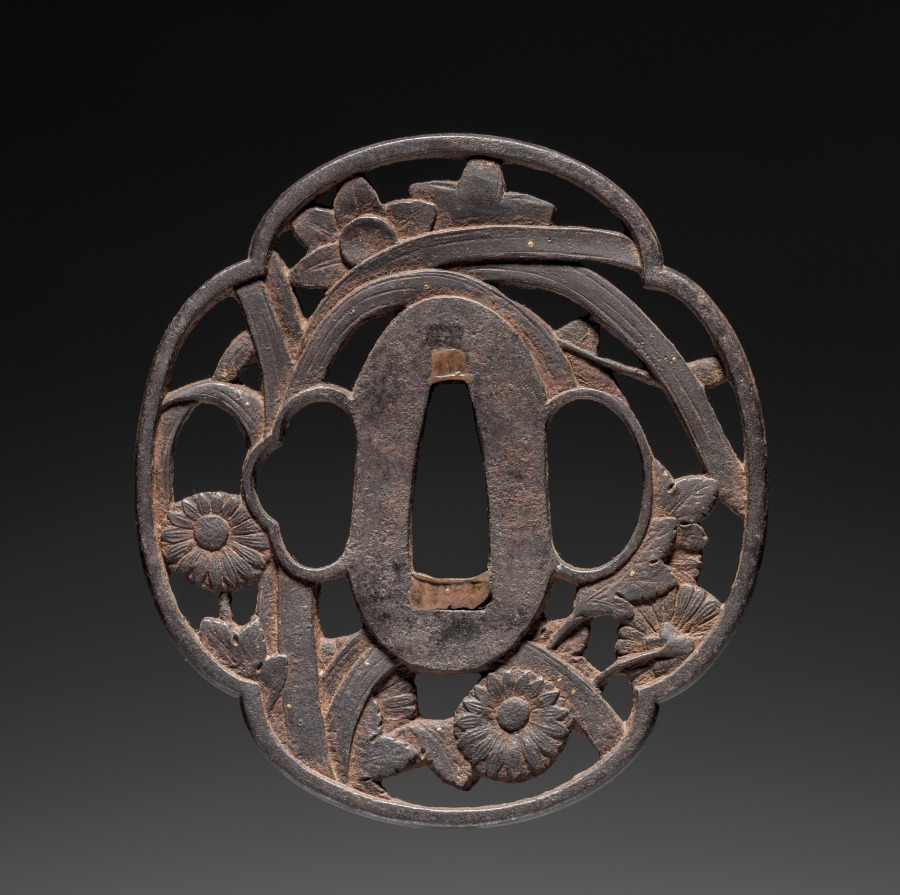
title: Sword Guard (Tsuba)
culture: Japan, Edo period (1615–1868)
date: 1615–1868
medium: iron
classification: Arms and Armor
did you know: This sword guard has been attributed to the Chosu school.